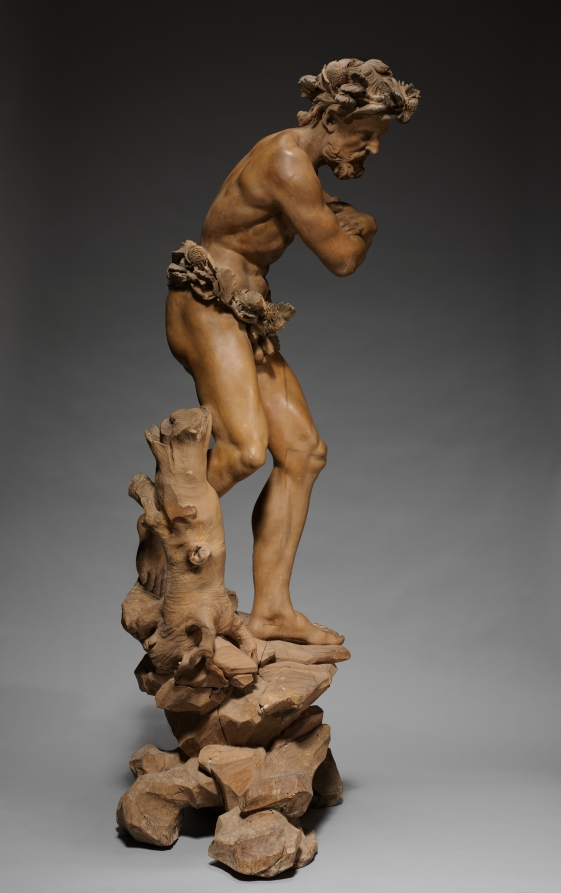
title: Winter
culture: Italy, 17th century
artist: circle of Filippo Parodi (Italian, 1630–1702)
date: c. 1700–1725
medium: wood with traces of gesso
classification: Sculpture